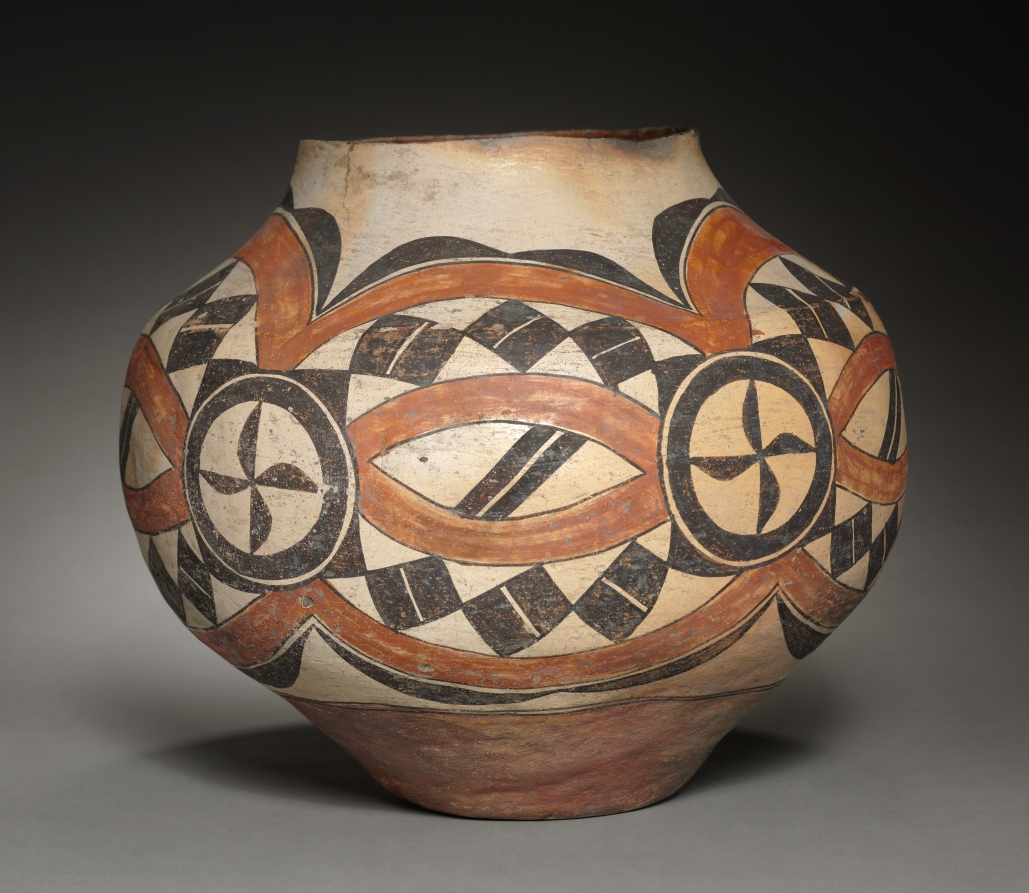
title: Jar (Olla)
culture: Southwest, Pueblo, Acoma, Laguna, Post- Contact Period,19th century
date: 1875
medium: pottery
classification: Ceramic